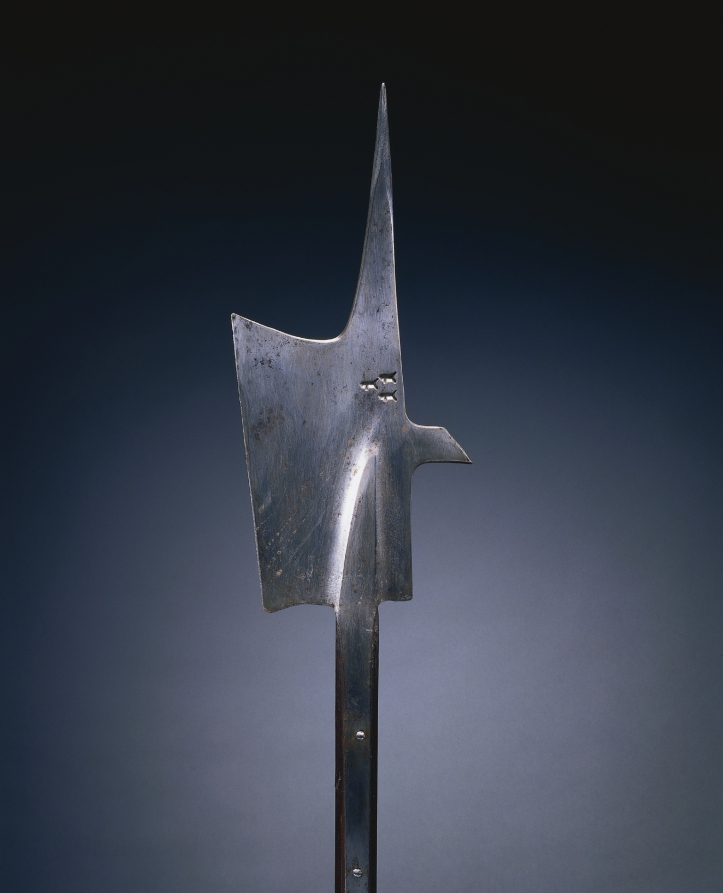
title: Halberd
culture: Switzerland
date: c. 1480–1500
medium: steel; wood haft (rectangular with planed corners)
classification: Arms and Armor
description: The halberd was a staff weapon favored by European infantries (foot soldiers) of the 1400s and 1500s for its versatility and deadly effect. The word halberd comes from the German words Halm (staff) and Barte (axe). The halberd is, in fact, an axe that served multiple functions: the axe blade was used for hacking, the spike for thrusting, and the beak for piercing plate armor or for pulling a knight from his saddle. The halberd was used by shock troops (those who lead an attack) and by Swiss and German mercenaries. After about 1550, the halberd gradually became less functional. Its large blade provided space for coats of arms and insignia. By the late 1500s, the parade halberd had become a ceremonial weapon for palace guards.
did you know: A Franciscan monk wrote in the 1340s how terrible and fierce the Swiss, armed with halberds, were at the Battle of Morgarten.